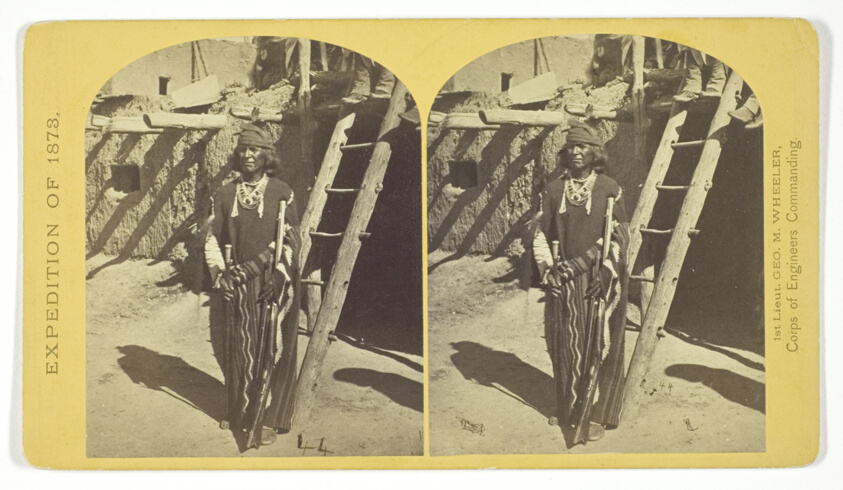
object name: Photograph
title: War Chief of the Zuni Indians, No. 20 from the series "Geographical Explorations and Surveys West of the 100th Meridian"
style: 19th century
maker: Timothy O'Sullivan (American, born Ireland, 1840–1882); commissioned by George Wheeler for the War Department, Corps of Engineers, U.S. Army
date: 1873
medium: Albumen print, stereo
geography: United States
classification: stereograph (albumen); photography; photograph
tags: Collected by Hugh Edwards, Geographical Explorations and Surveys